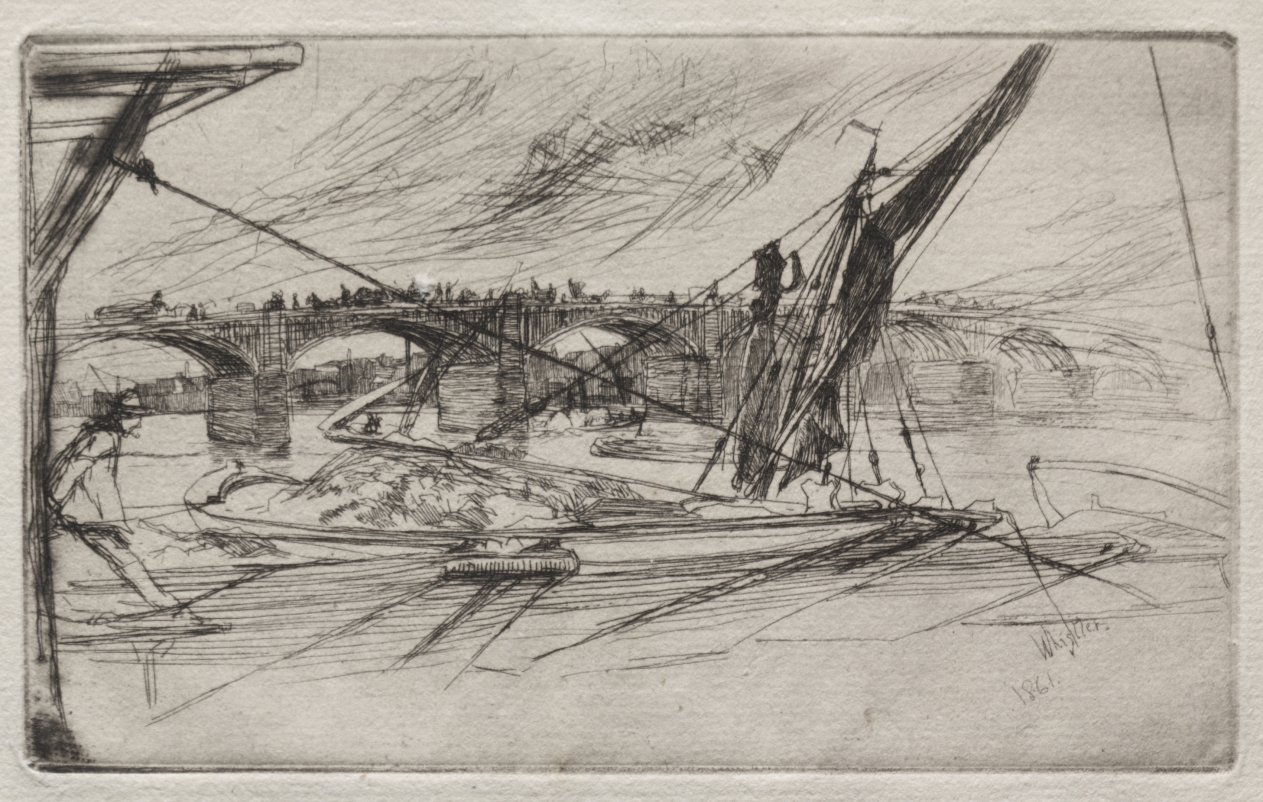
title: Vauxhall Bridge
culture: America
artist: James McNeill Whistler (American, 1834–1903)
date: 1861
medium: etching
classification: Print